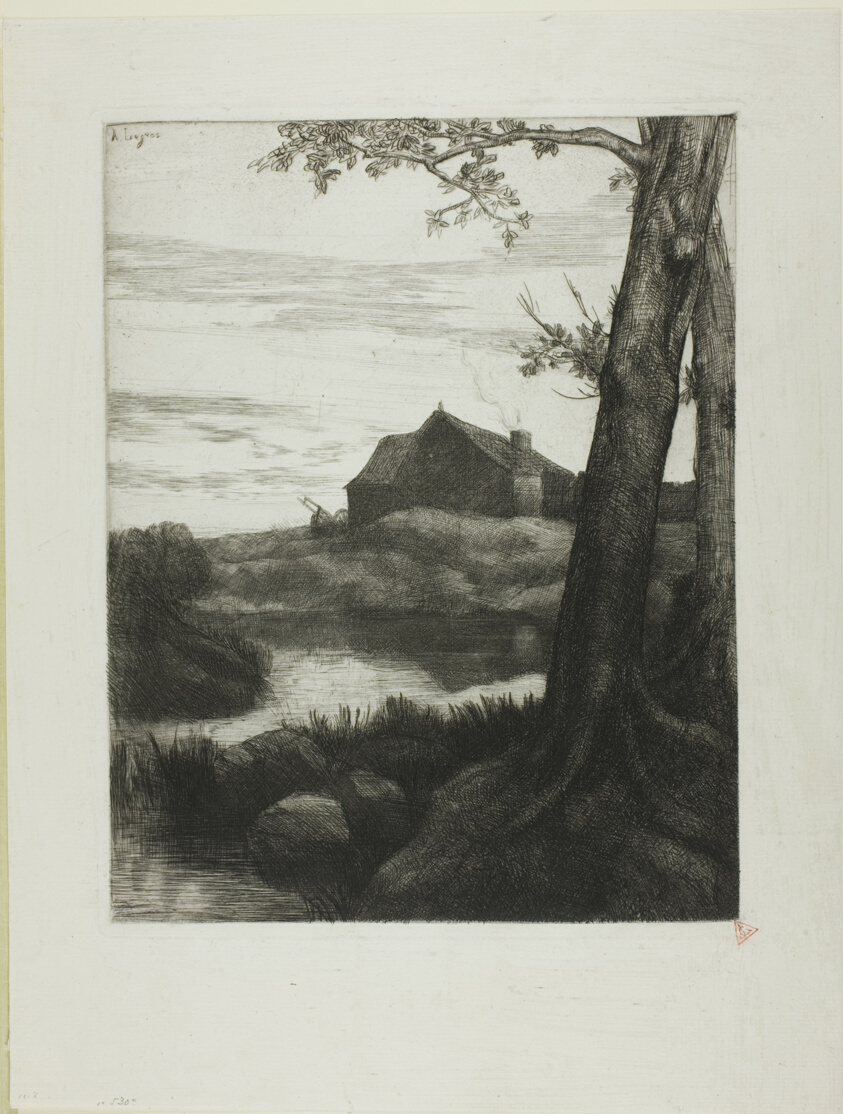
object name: Print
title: Farm with Large Tree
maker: Alphonse Legros (French, 1837-1911)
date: c. 1855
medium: Etching and drypoint on cream laid paper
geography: France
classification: etching; print; prints and drawing